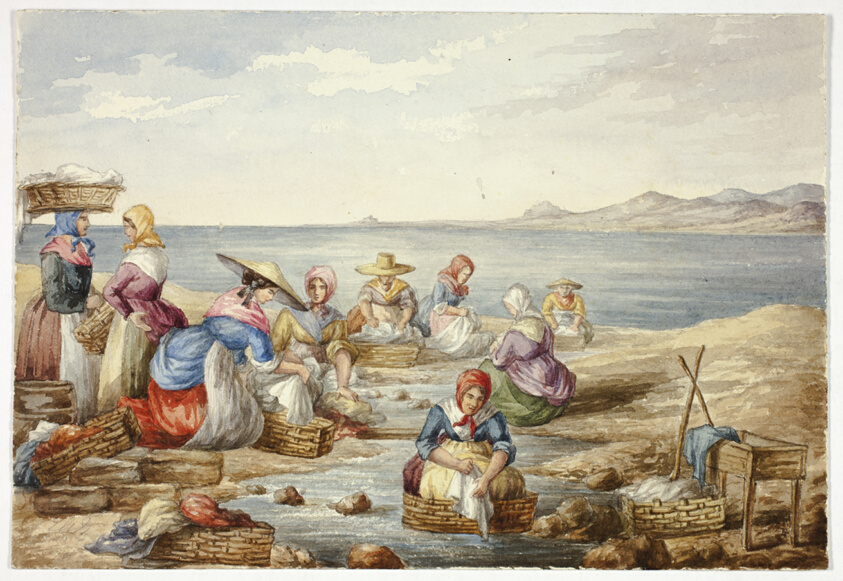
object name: Drawing and Watercolor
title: Washerwoman at Nice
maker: Elizabeth Murray (English, c. 1815-1882)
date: February 1842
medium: Watercolor over graphite on cream wove paper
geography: England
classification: watercolor; drawings (visual works); prints and drawing